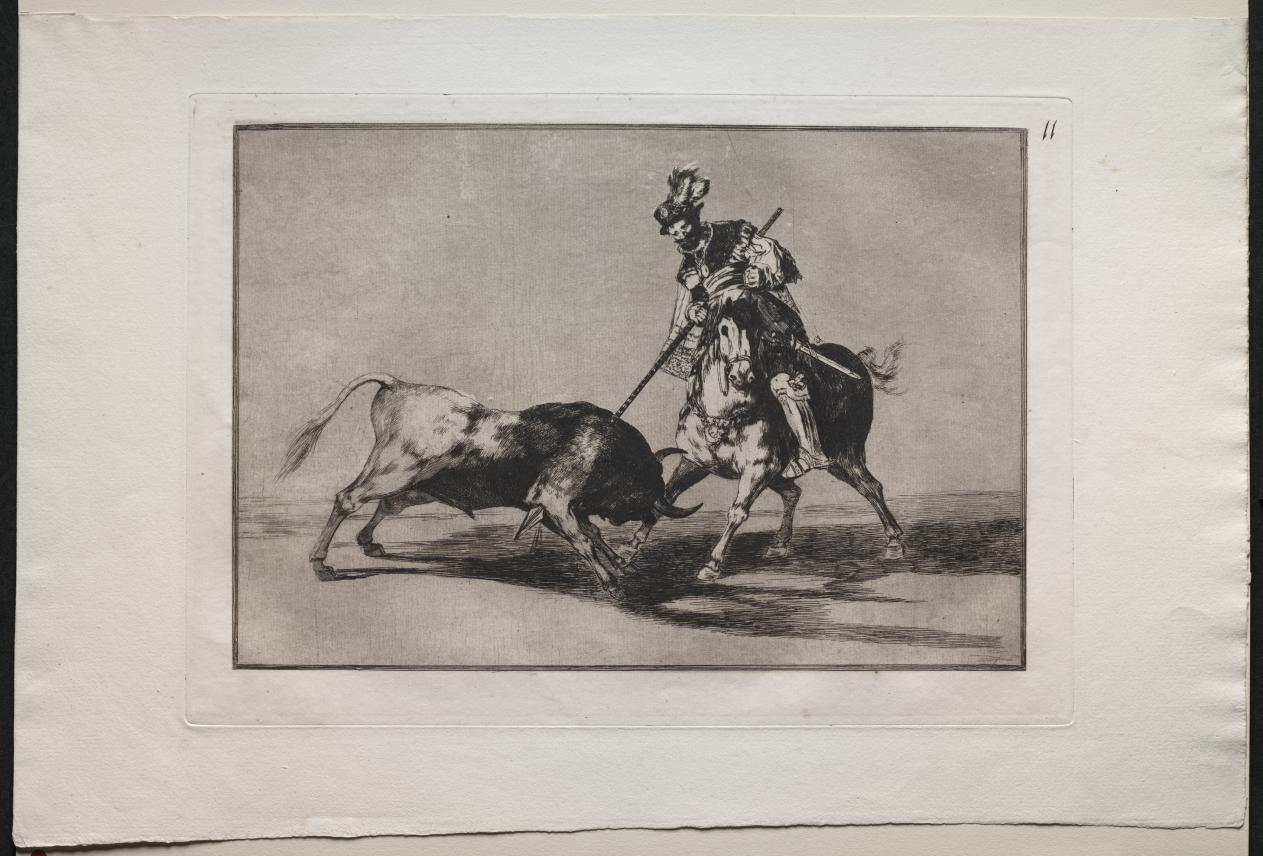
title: Bullfights: El Cid Campeador Spearing Another Bull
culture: Spain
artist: Francisco de Goya (Spanish, 1746–1828)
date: 1816, printed 1876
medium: engraving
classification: Print